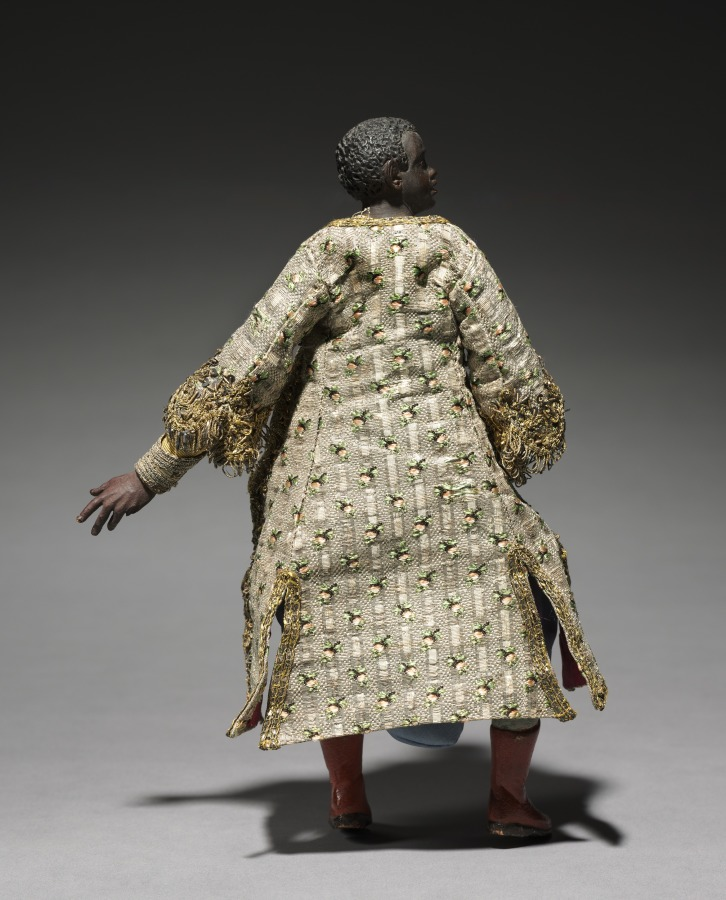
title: Figure from a Crèche: Attendant of the Magi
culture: Italy, Naples, late 18th-early 19th century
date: 1780–1830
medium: painted wood and terracotta with various textiles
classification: Sculpture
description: The practice of creating scenes of the Nativity for the home dates from the early 1700s in Italy, where people began to set up doll-like figures of about a foot or less in height. The custom was particularly popular in Naples around 1800, where crèche scenes (crèche means cradle, or crib) included many figures, whose heads and hands of painted terracotta, stuffed cloth bodies, and clothing adapted from contemporary local costumes gave them an amazingly realistic character. Representations of the birth of Jesus can be traced to the first few centuries of Christianity. Both living creatures and sculptural depictions of them were used from early times. By the late Middle Ages it was customary to create life-size figures of wood or stone, naturalistically painted, to represent the characters who participated in the events of Jesus's early life. These sculptures were then arranged in scenes illustrating one or both of the most important of these events, the Adoration of the Shepherds and the Adoration of the Magi—the three kings from the east who came to pay homage to the Christ child. Used in churches, these large figures were especially popular in Italy, Central Europe, Spain, and Portugal.